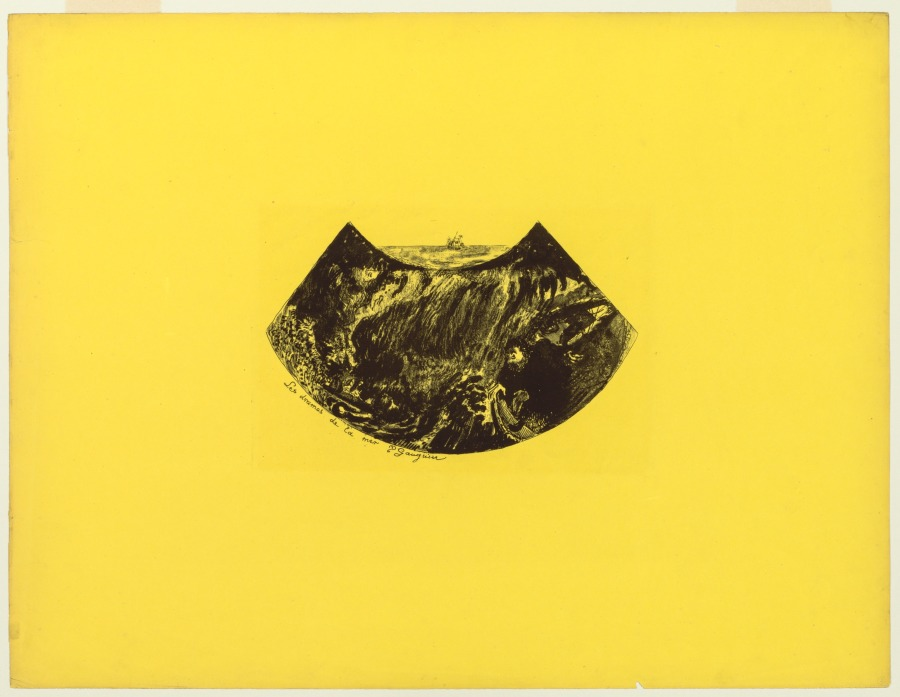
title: Volpini Suite: Dramas of the Sea (Les Drames de la Mer)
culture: France, 19th century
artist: Paul Gauguin (French, 1848–1903)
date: 1889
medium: zincograph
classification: Print